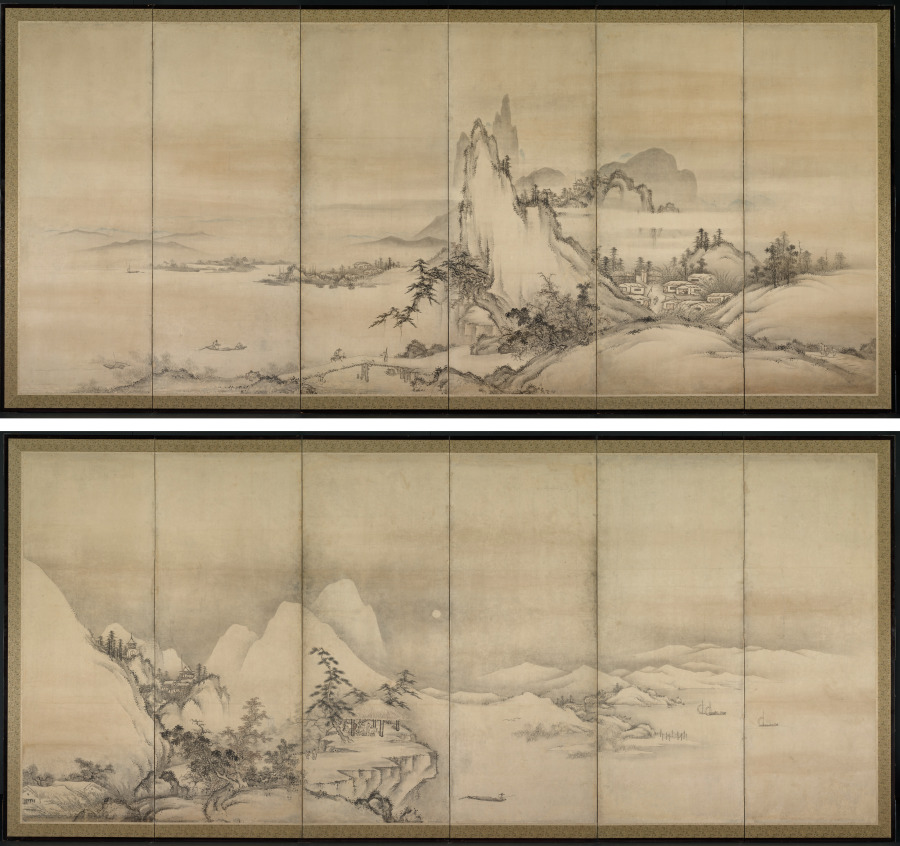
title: Chinese Landscape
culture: Japan, Muromachi period (1392–1573)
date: 1500s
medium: Pair of six-fold screens; ink and slight color on paper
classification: Painting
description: In a panorama of mountains and expanses of water, three gentlemen have assembled by moonlight to enjoy one another’s company away from a bustling village. An influx of ink paintings from China in both album and scroll formats beginning in the late 1200s inspired Japanese artists to create landscapes based upon Chinese prototypes. Later, Japanese painters adapted the imagery to the larger format of folding screens, which were used to define spaces in large rooms.